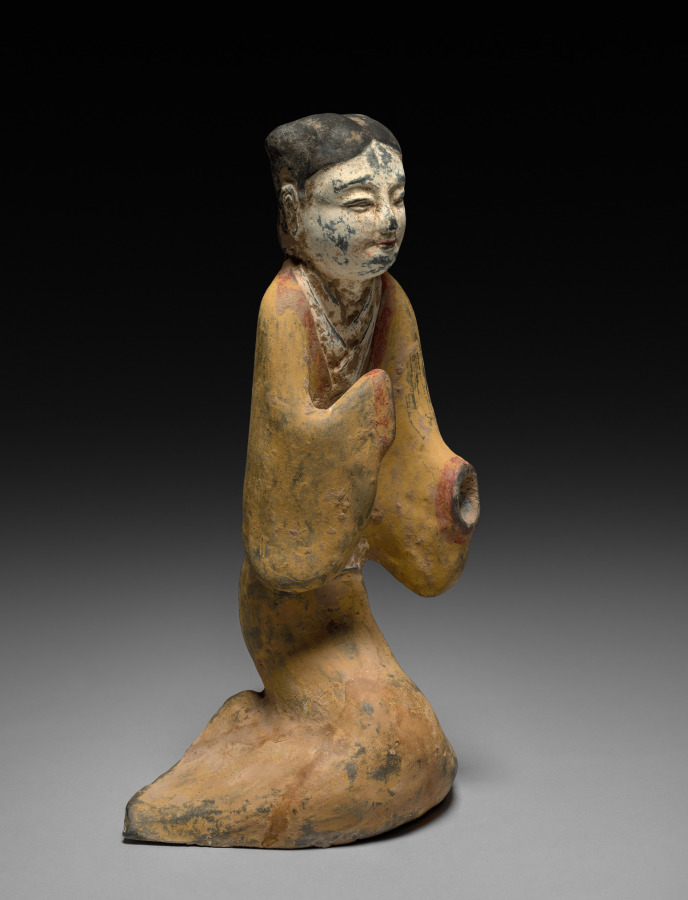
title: Kneeling Woman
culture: China, Western Han dynasty (206 BCE–8 CE) to Eastern Han dynasty (25–220 CE)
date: 100 BCE–100 CE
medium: painted earthenware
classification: Sculpture